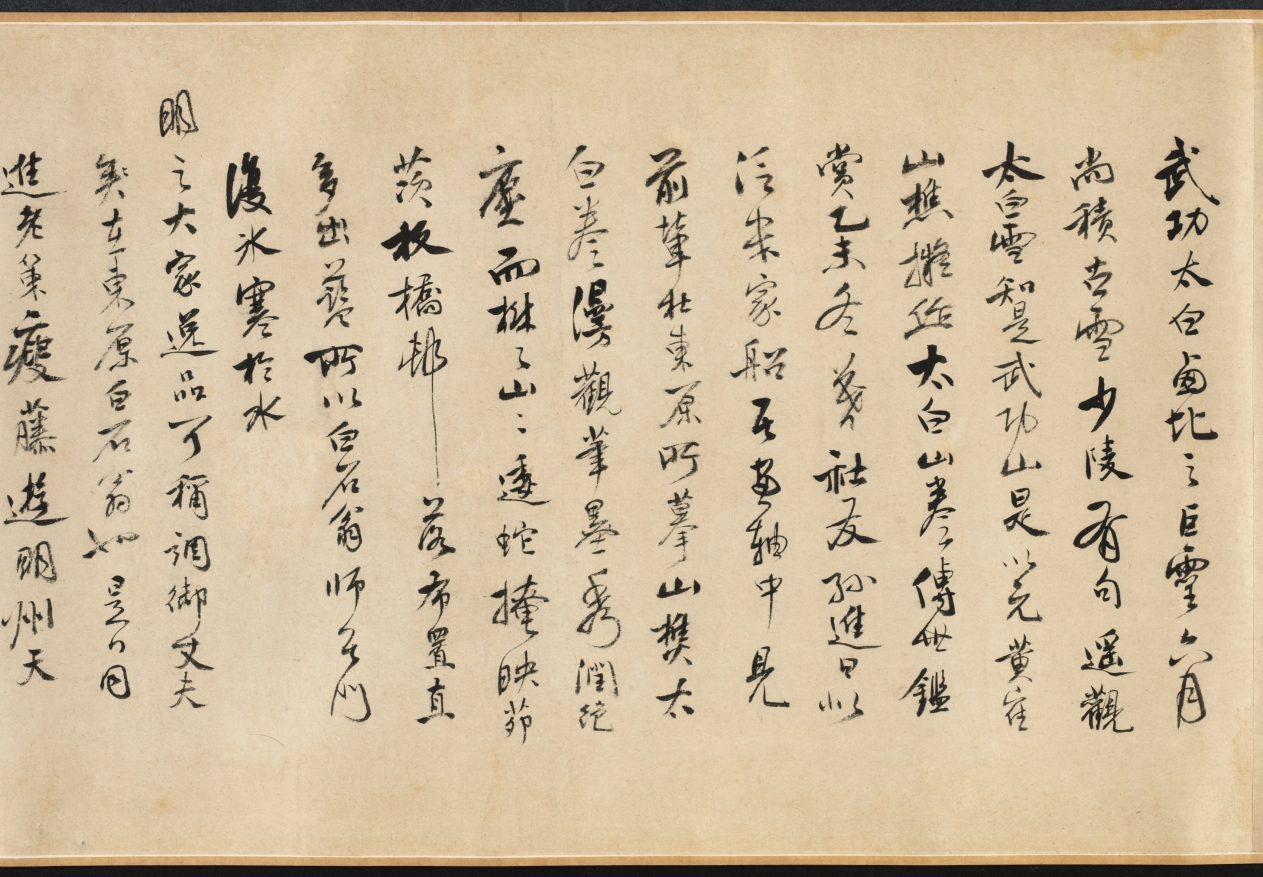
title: Mt. Taibo in the Style of Wang Meng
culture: China, Ming dynasty (1368–1644)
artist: Du Qiong (Chinese, 1396–1474)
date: 1442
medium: handscroll; ink and light color on paper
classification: Painting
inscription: Artist's inscription, signature, and 11 seals: [1 seal] Tung-yüan chai. Huang-ho-shan-ch'iao [Wang Meng] painted a painted called T'ai-po Mountain. Its brushwork is superior and admirable, which is very close to Yu-ch'en [Wang Wei, 699-759]. The cleverness of its composition, the maple groves and rustic temples, the inaccessible ravines and autumnal plateaus, the periolous peaks and strange rocks, etc., all seem to be so natural. The paper is only a little over eight feet, but the landscape has the range of a thousand miles. Once you open and note the contents, it is as if one were roaming among the mountain peaks enveloped in mist and clouds, and forgot the dusty world. When I first saw this, I was so mixed with excitement and joy that I could not take my hands off the painting. So I put it on the table, and tried my best to imitate it, forgetting sleeping and eating for about three months before it was completed. Although I do not dare to tread in the footsteps of Huang-ho shan ch'iao, I took great pains to capture his spirit in composition and colors. I do not know whether it would pass the judgment of the experts. On the fifteenth day of the fifth month, the seventh year of the Cheng-t'ung year [1442], inscribed by Tung-yüan, Tu Chiung. [2 seals] Yung-chia; Ching-chieh ming-men. [8 seals on painting] Tung-yüan chai; Ching-chieh ming-men; Yung-chia; Tu Ch'iung yin; Tung-yüan (repeated 5 times). trans. WKH/LYSL 3 colophons and 7 additional seals: 1 colophon and 2 seals of Chou Ting (1401-1487); 1 colophon and 2 seals of Wu K'uan (1435-1504); 1 colophon, dated 1655, and 2 seals of Lan Ying (1585-after 1664).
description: When a Chinese painter "imitated" a painting by a past master, the intention was never to produce an exact copy. Du Qiong, the Ming painter from Suzhou, is a case in point. The painting style of this handscroll is actually closer to that of Huang Gongwang (1269–1354) than to the style of Wang Meng (about 1301–1385). Both masters were active during the previous dynasty and are among the so-called Four Great Masters of the Yuan dynasty (1279–1368). In this painting, the interplay of styles, including Du Qiong's own, contribute to an inner dimension that is more than visual. Mt. Taibo is located in the province of Zhejiang and is known for its scenic beauty. In this scroll, however, it is not depicted literally. The image is an ideal representation of mountains in southeastern China.